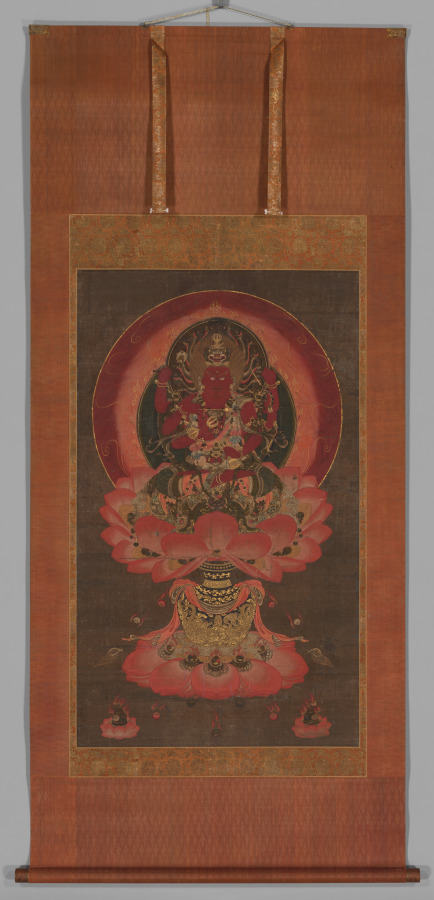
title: Aizen Myōō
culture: Japan, Kamakura period (1185–1333) to Nanbokuchō period (1336–92)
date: 1300s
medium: Hanging scroll; ink, color, and gold on silk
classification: Painting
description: Aizen Myōō is the Wisdom King of Passion. He is one of the Five Great Wisdom Kings who protect the Five Wisdom Buddhas. Each of these Buddhas represents one of the five types of wisdom characterizing a mind purified of disturbing emotions, such as desire, fear, and anger. Aizen’s body is red, and he has six arms. He has a flaming mandorla, or body halo, and sits upon a lotus supported by a vase from which flaming, wish-fulfilling jewels flow freely.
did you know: Desires are mentally deposited into the mouth of Aizen's lion so that they can be consumed.